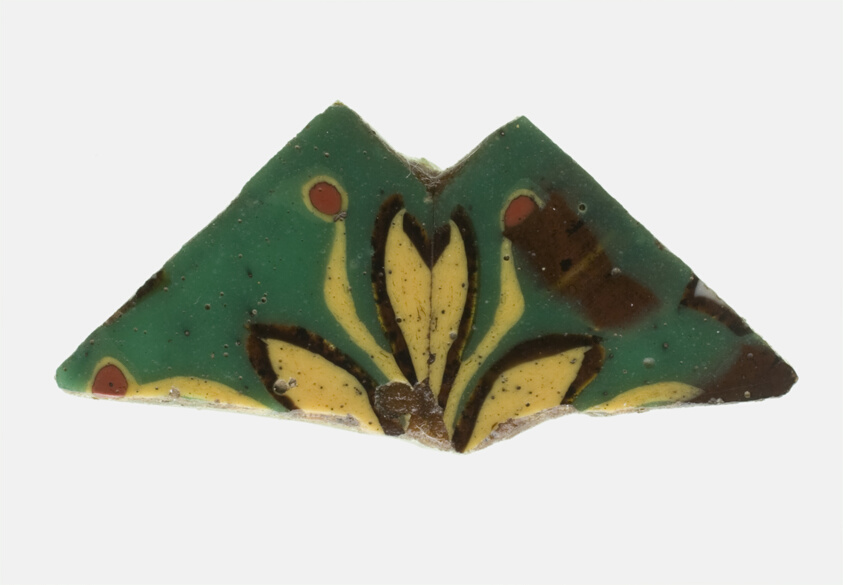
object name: Decorative Arts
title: Fragment of a Floral Inlay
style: ptolemaic, greco-roman (egyptian)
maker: Egyptian or Roman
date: Ptolemaic Period–Roman Period, (1st century BCE–1st century CE)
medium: Glass, mosaic technique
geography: Egypt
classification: glass; inlay; ancient art; decorative arts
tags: floral